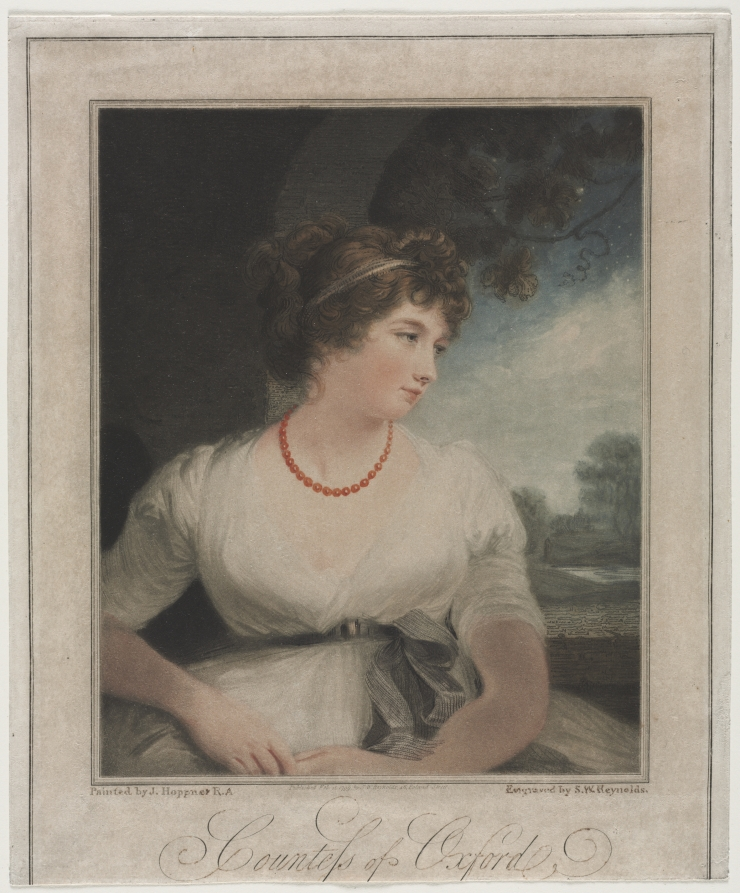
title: The Countess of Oxford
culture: England, 18th century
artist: Samuel William I Reynolds (British, 1773–1835)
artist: after John Hoppner (British, 1758–1810)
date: 1799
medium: mezzotint, etching and drypoint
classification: Print